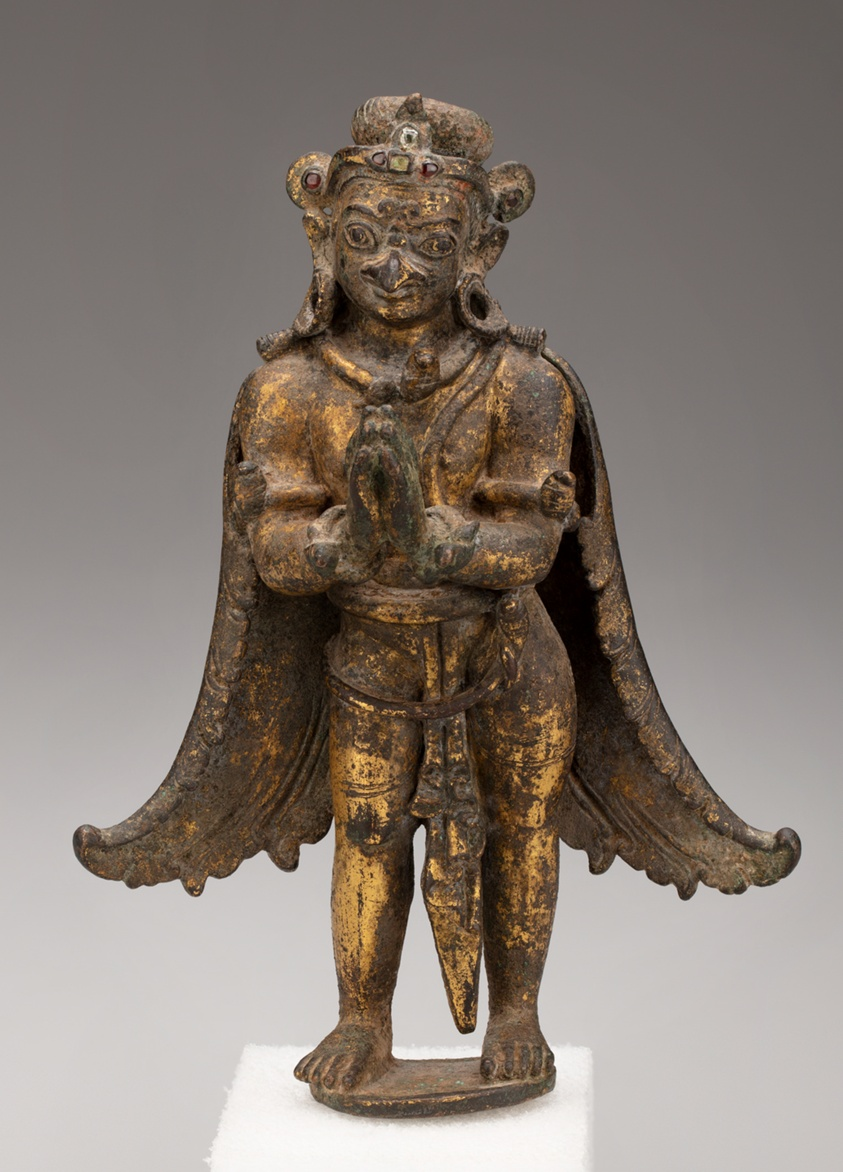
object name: Sculpture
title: God Vishnu's Mount, Garuda, Standing with Hands in Gesture of Adoration (Anjalimudra)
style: Himalayan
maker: Nepal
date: 13th century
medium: Gilt bronze with gemstones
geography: Nepal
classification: bronze; metal; sculpture; asian art